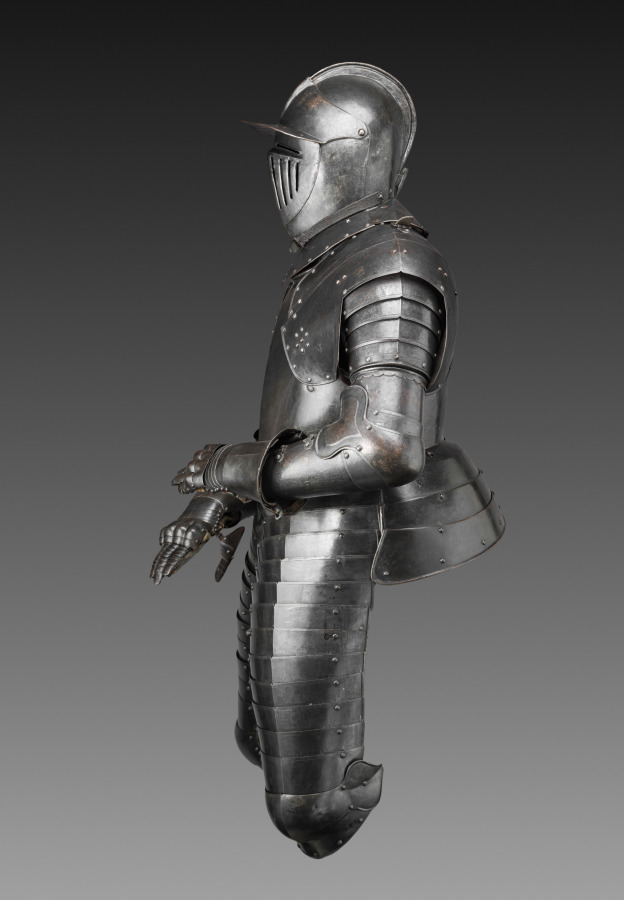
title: Cuirassier's Armor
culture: Austria, Graz(?), early 17th century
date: c. 1600–20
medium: steel (originally blued, now black); leather straps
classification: Arms and Armor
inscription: Proof mark (musket shot) is located on the proper left side of the breastplate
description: The cuirassier was the heavy cavalryman of the late 1500s and early 1600s. Carrying pistols and a sword, he was clad in full armor, like this suit, with the exception of his lower legs, which were protected by heavy riding boots. Shortly after 1650, such heavy cavalry armor disappeared from use. By then, European cavalries had abandoned full armor as impractical against the increased sophistication of firearms. Similar armors survive in the Armory of Graz, Austria.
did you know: This suit of armor is just over 5 1/2 feet tall.